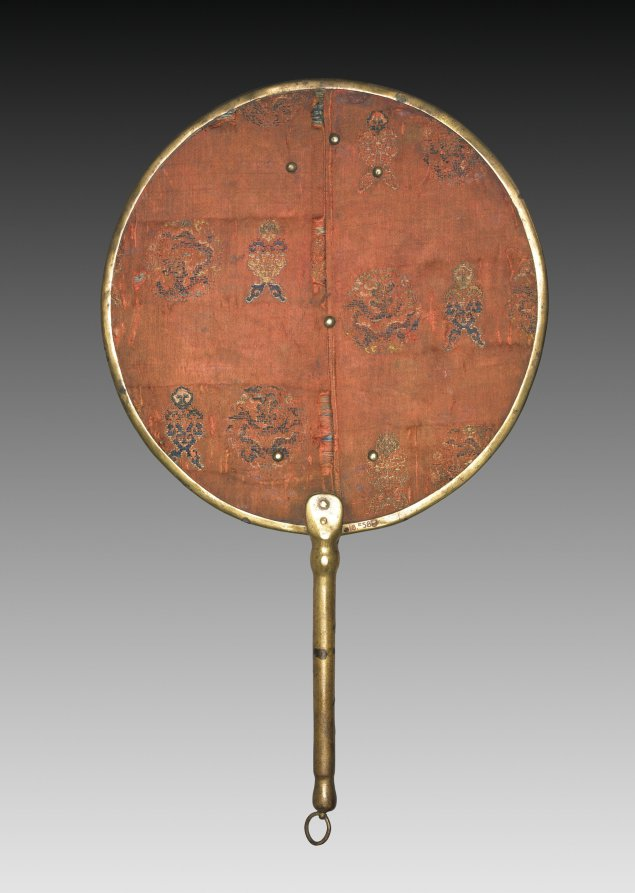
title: Wedding Fan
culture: Korea, Joseon dynasty (1392–1910)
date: mid-1800s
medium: Copper alloy; satin weave silk; silk and metal thread embroidery; and paper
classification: Miscellaneous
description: In the Joseon period, women between the ages of 14 and 20 were matched with a husband through an arranged marriage. Even during the marriage ceremony, a bride was supposed to veil her face with this type of embroidered fan as a gesture of chastity. The fan’s body is made of paper and silk trimmed with a gilded metal rim. On the front, four cranes—one pair in blue, the other in yellow—are stitched along with auspicious clouds. The back is adorned with dragons flying amid clouds. The metal band vertically running down the center is incised with a bat, a symbol of wealth.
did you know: This fan was not to cool oneself, but rather to veil a bride's face during a wedding ceremony as a gesture of chastity.